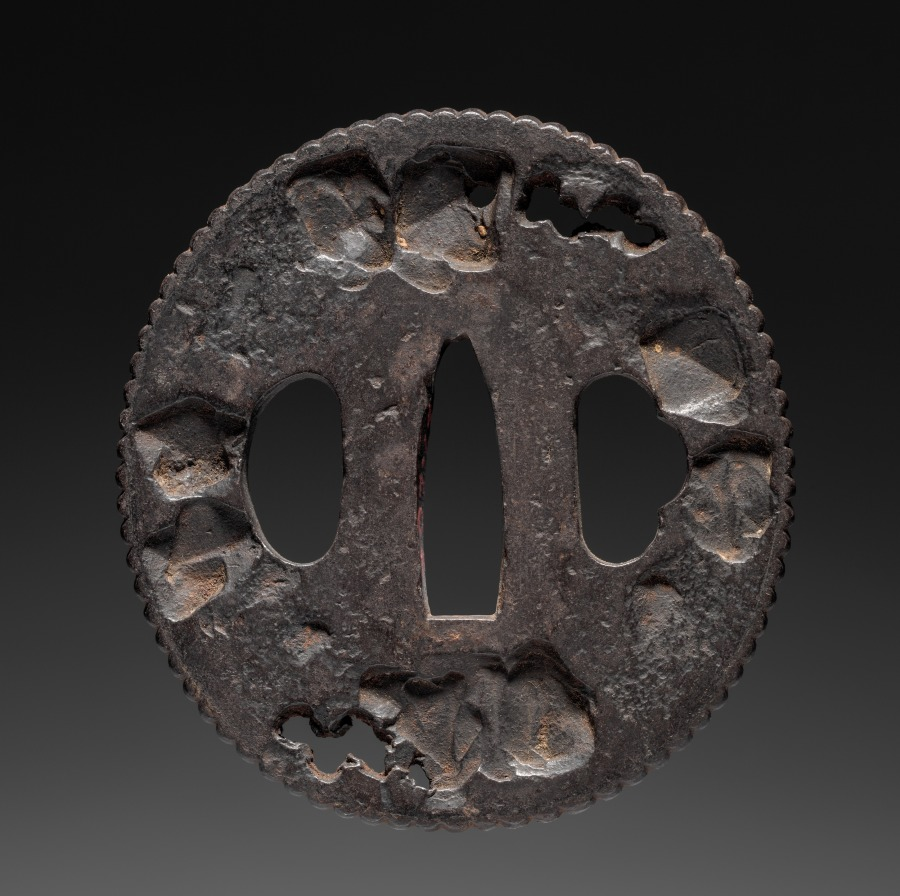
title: Sword Guard (Tsuba)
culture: Japan, possibly Edo period (1615-1868)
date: c. 1615–1868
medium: steel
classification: Arms and Armor